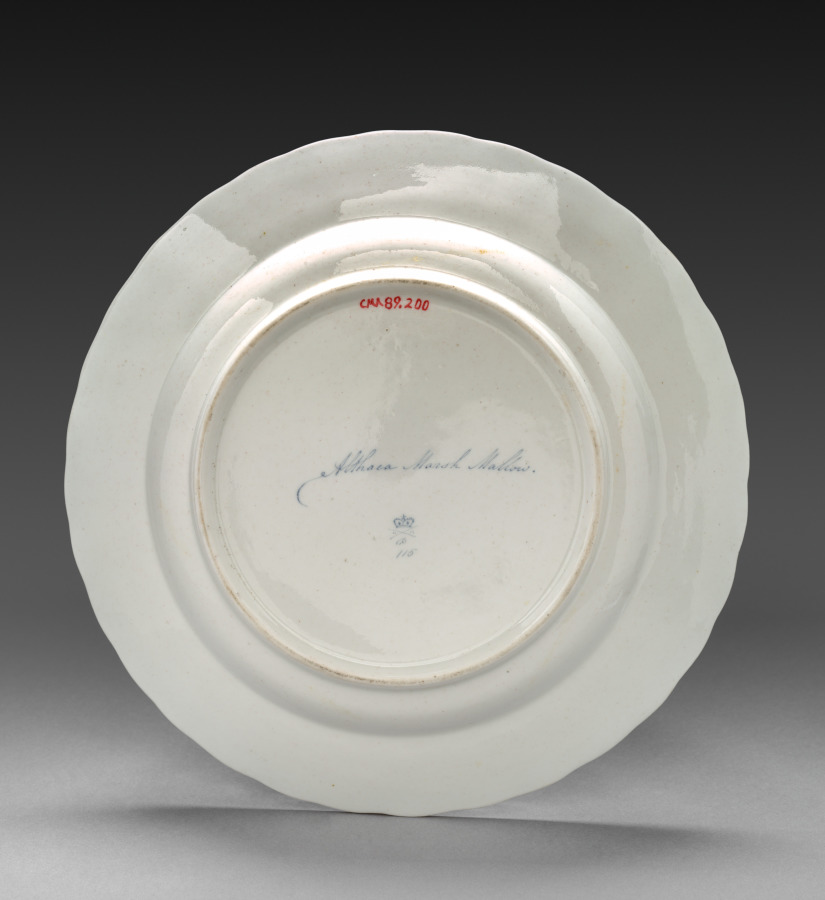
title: Plate from Dessert Service: Althaea Marsh Mallow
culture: England, Derby, 18th century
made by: Derby (Crown Derby Period) (British)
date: c. 1800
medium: porcelain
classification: Ceramic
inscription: inscribed in blue on back: Althaea Marsh Mallow./crown/crossed batons and dots/D/115.